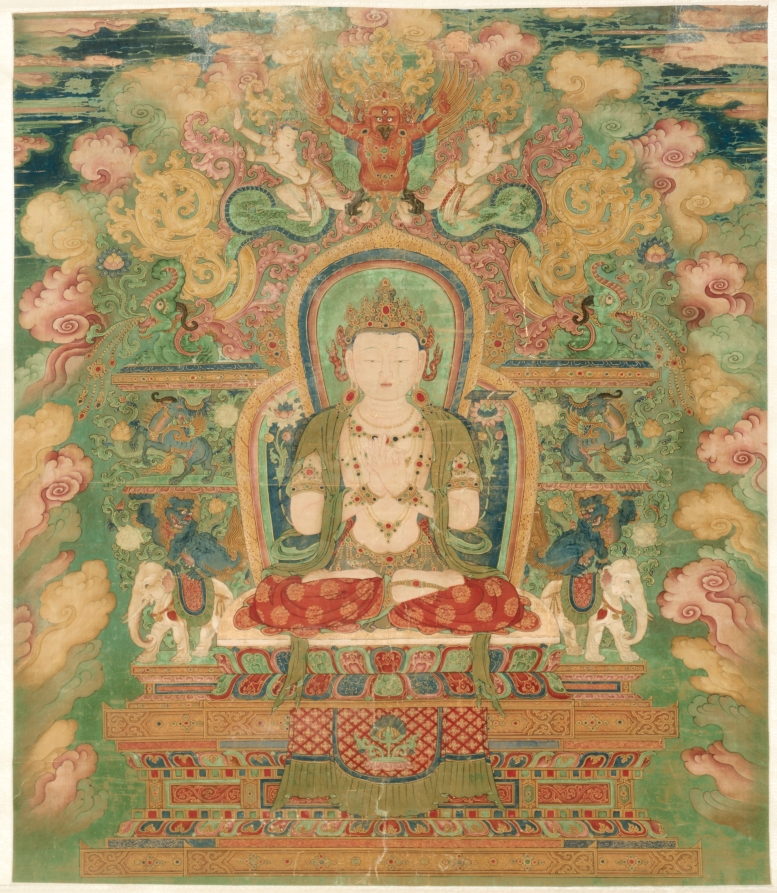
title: Manjushri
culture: China, Ming dynasty (1368–1644)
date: c. 1500–1550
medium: Hanging scroll, ink, color and gold on silk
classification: Painting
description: A Chinese artist's interpretation of an Indo-Nepalese throne surrounds the white figure of Manjushri, the bodhisattva of wisdom. Chinese textiles and jewels drape fluidly over the body, the red lower garment offering a contrast to the abundance of malachite green that dominates the composition. Swirling clouds of variegated hues around the periphery add to the mystical, almost magical mood of this iconic figure. His hands are in the gesture of imparting the Buddhist teachings, while his posture and expression reveal that wisdom can be perceived through the practice of yogic meditation.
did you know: The book on the lotus by the figure's left shoulder identifies him as Manjushri, the bodhisattva of wisdom.